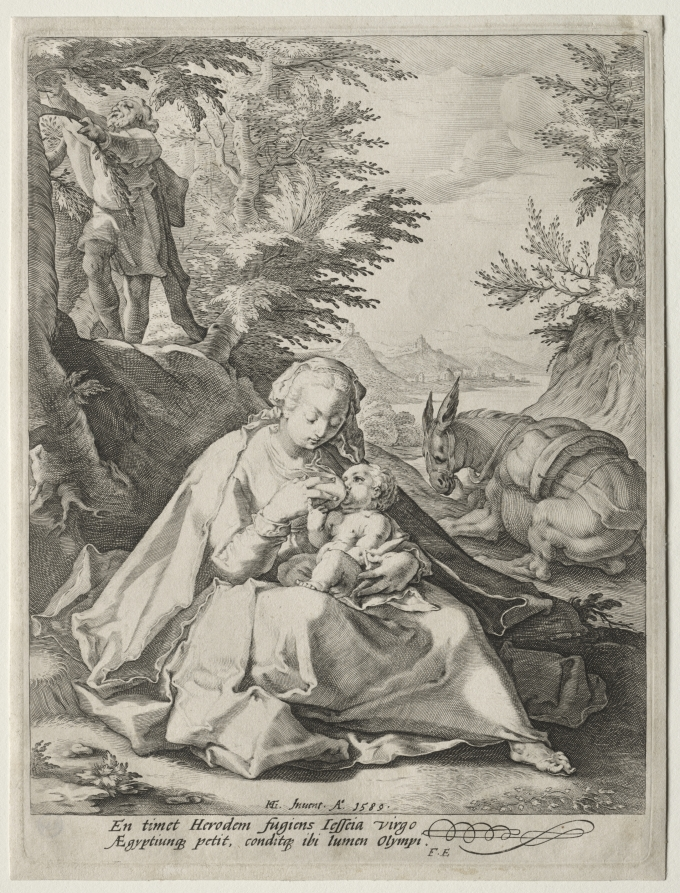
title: Rest on the Flight into Egypt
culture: Netherlands, 16th century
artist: attributed to Jacob Matham (Dutch, 1571–1631)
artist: after Hendrick Goltzius (Dutch, 1558–1617)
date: 1589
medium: engraving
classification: Print